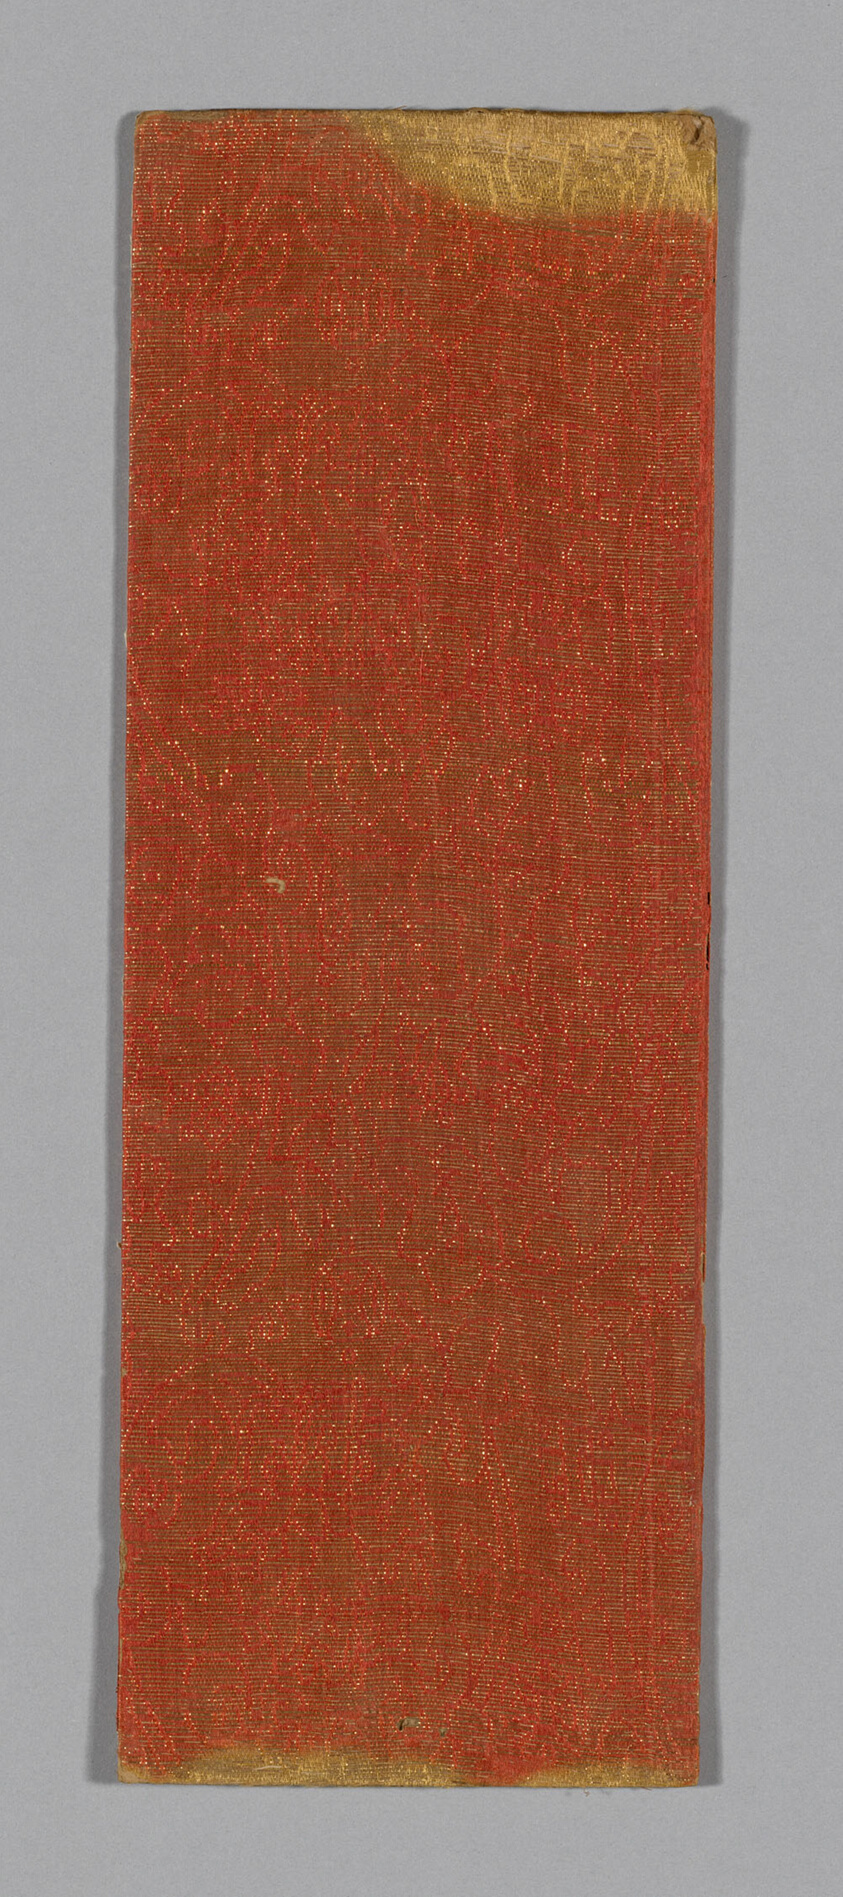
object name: Textile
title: Sutra Cover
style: ming, Chinese (culture or style), East Asian, asian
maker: China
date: Ming dynasty (1368–1644), c. 1590's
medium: Silk and gold-leaf-over-lacquered-paper strip, warp-float faced 4:1 satin weave with supplementary patterning wefts bound in weft-float faced 1:4 satin interlacings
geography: China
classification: textile; weaving